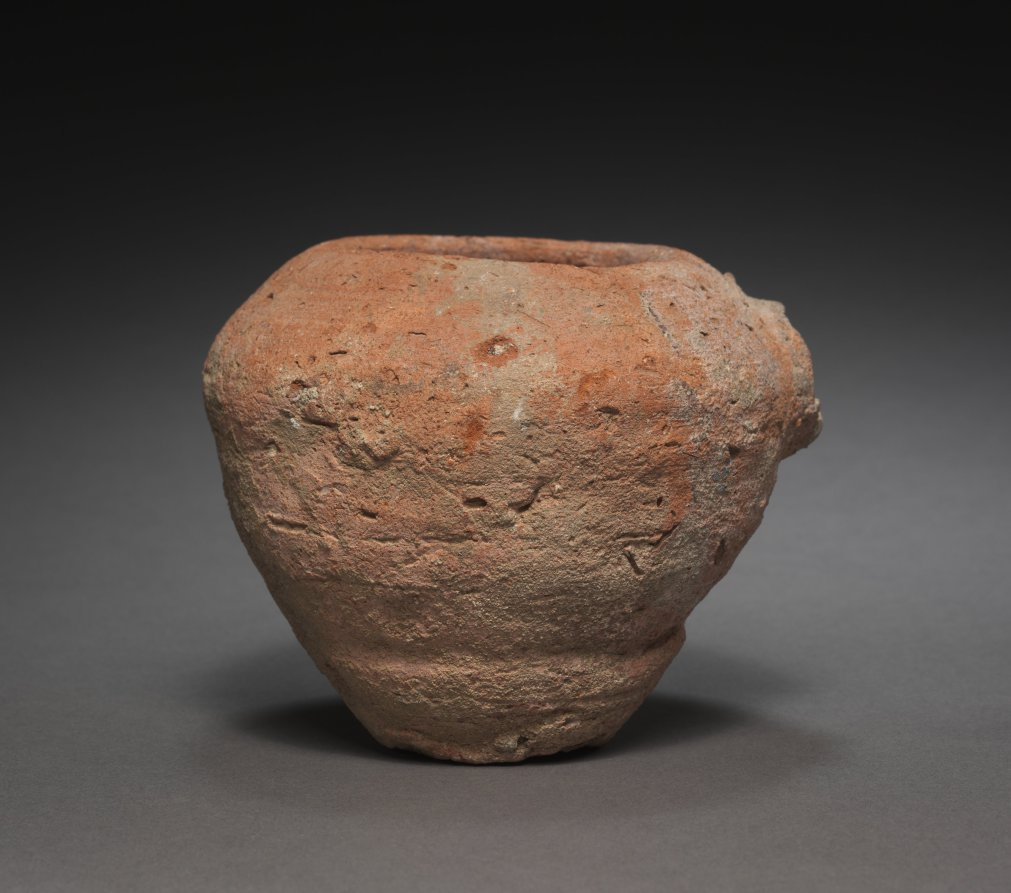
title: Spouted Jar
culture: Egypt, Middle Kingdom (2040–1648 BCE)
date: 2040–1648 BCE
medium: Nile silt ware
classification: Vessels